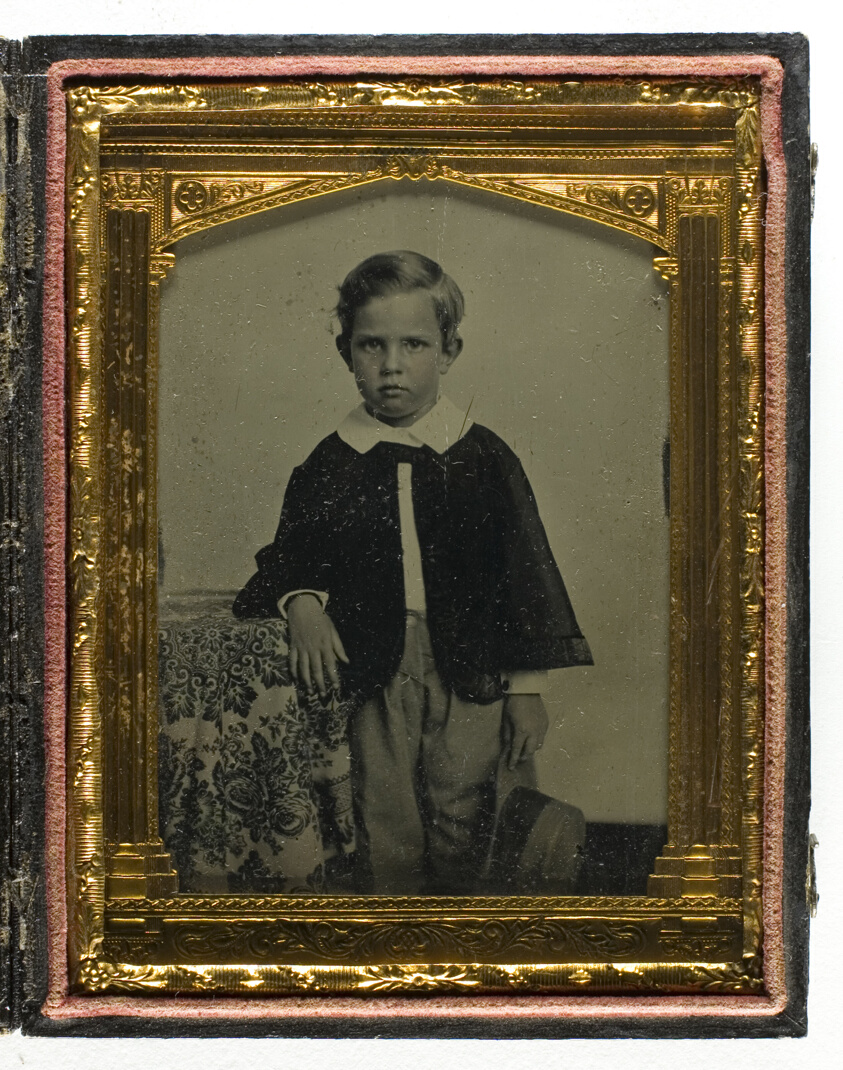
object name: Photograph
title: Untitled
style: 19th century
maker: B & G Moses (American, active 1850s–1860s)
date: 1857/60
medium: Ambrotype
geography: United States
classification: daguerreotype; photographic process; photography; photograph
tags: portraits, portraits: male subject, photography, portraits: child subject